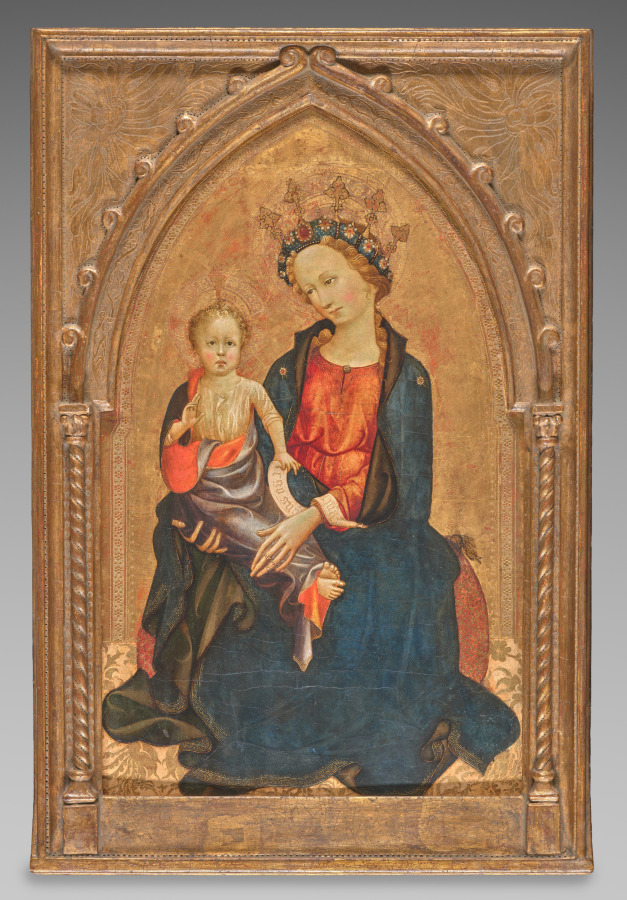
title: Madonna and Child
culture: Italy, Florence, active in Spain, late 14th-early 15th century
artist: Gherardo Starnina (Italian, c. 1360–before 1413)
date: c. 1400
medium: oil and gilding on wood panel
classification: Painting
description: Although Gherardo Starnina is regarded as one of the most important painters of his time in Florence, little is known about him. He probably studied with a well-regarded Florentine painter who made numerous frescoes. He is claimed to have participated in the painting of the frescoes in the Castellani Chapel in Santa Croce, Florence. Documents show that he worked extensively in Spain, specifically Toledo and Valencia, executing many panel paintings and frescoes there. Most of his known paintings are altarpieces, often illustrating scenes from the lives of the saints. Stylistically, Starnina drew from many sources, including the Late Gothic style he witnessed while in Spain, and he developed a uniquely independent, progressive manner. The lyrical grace of this Madonna and her Valencian-style crown owe much to his experience in Spain.